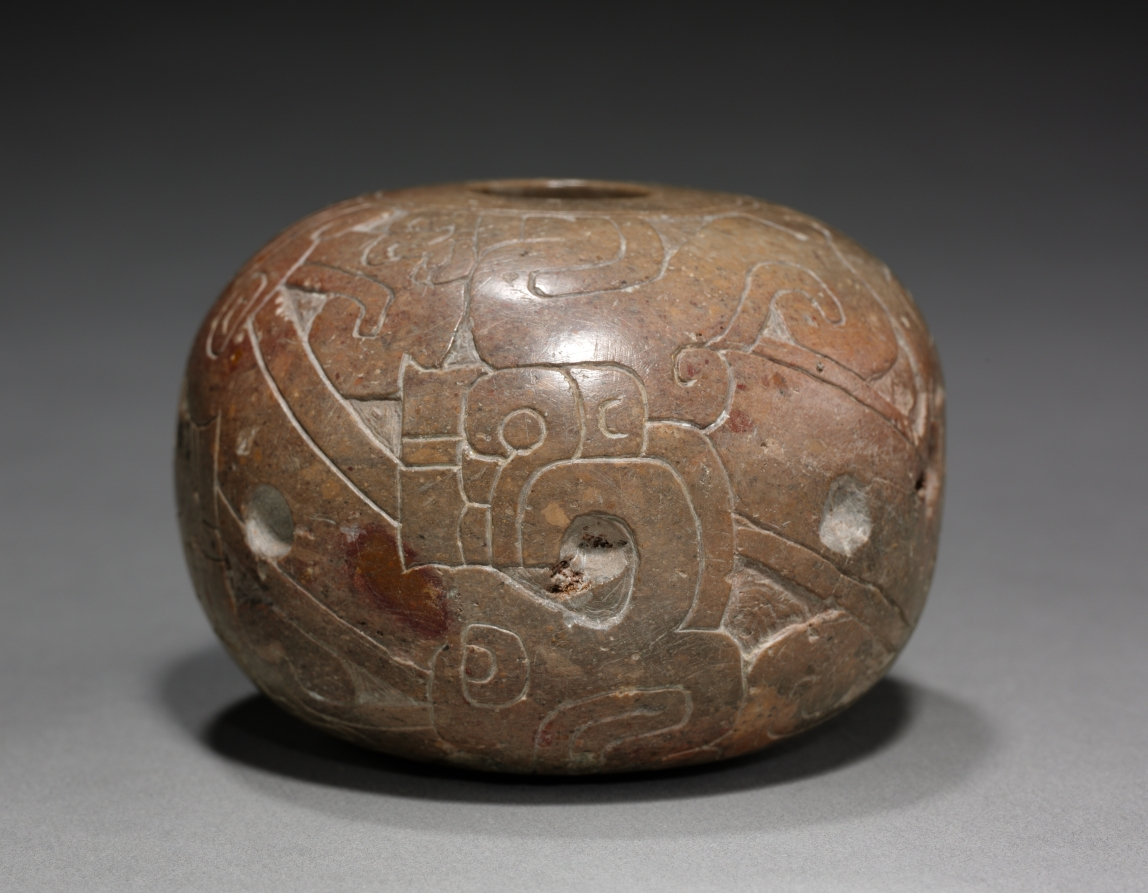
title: Container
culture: Peru, North Coast, Cupisnique style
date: 1200–200 BCE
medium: steatite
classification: Stone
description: While Chavín held sway in the highlands, coastal artists produced many objects in non-Chavín styles. Such is the case with these small, finely-carved, stone containers, which were part of north coast ritual paraphernalia, though their specific use in unclear. Both bear complex designs based on fanged heads in profile that lack lower jaws.